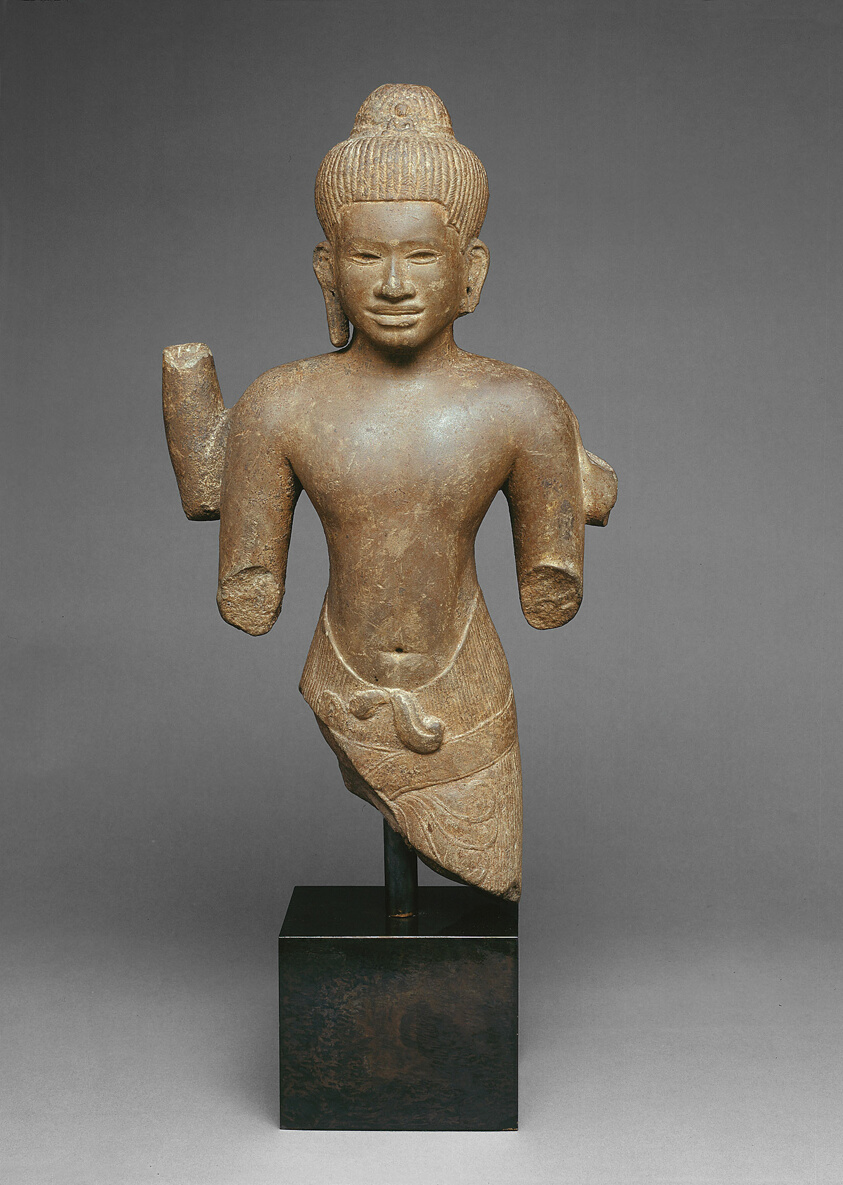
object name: Sculpture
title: Bodhisattva Avalokiteshvara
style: Southeast Asian, baphuon, angkor thom, angkorean, cambodian, asian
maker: Thailand or Cambodia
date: Angkor period, 11th century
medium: Sandstone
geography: Cambodia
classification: sandstone; stone; sculpture; asian art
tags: religion, bodhisattva, Buddhism